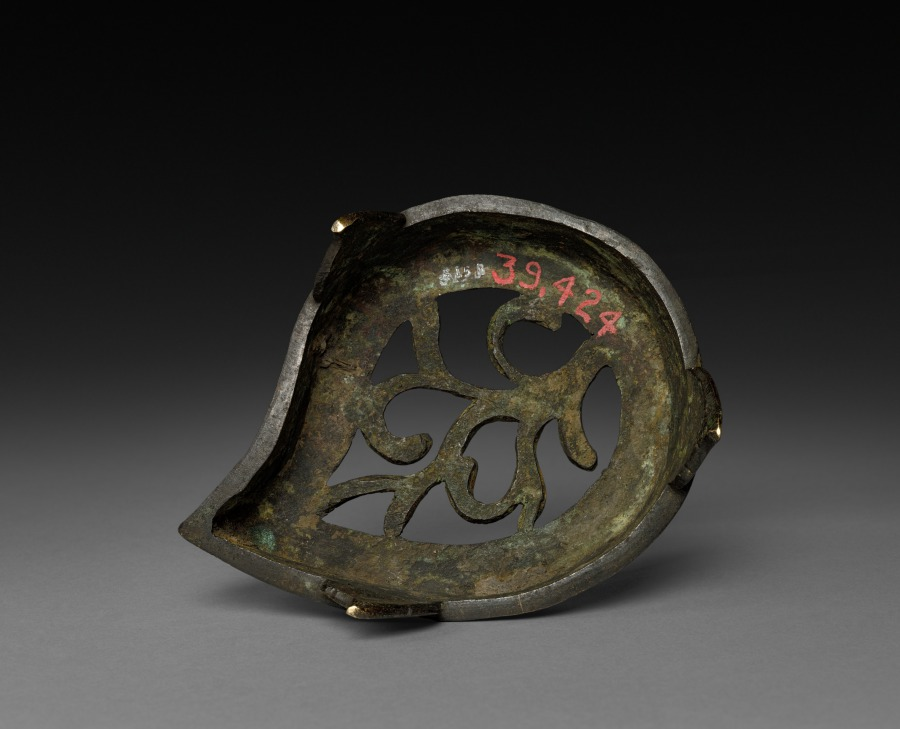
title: Leaf-shaped Trivet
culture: Japan, Meiji period (1868–1912) to Taishō period (1912–26)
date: early 1900s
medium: iron (?)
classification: Metalwork